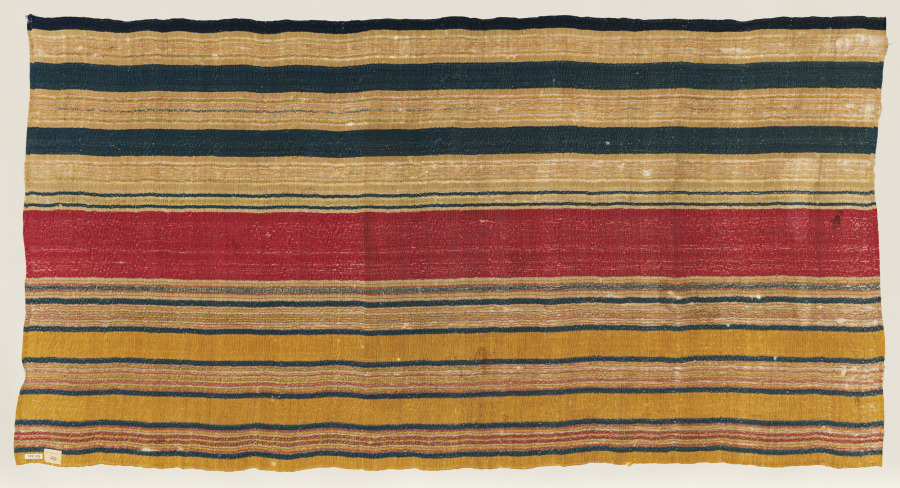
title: Furnishing textile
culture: Africa, North Africa, Morocco, Moroccan weaver(s)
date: 1600s–1700s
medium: Silk, dye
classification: Textile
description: This large, woven silk panel was woven by men in a workshop. It is a furnishing textile, used in the home as a wall hanging or perhaps as a curtain over a doorway or entrance.